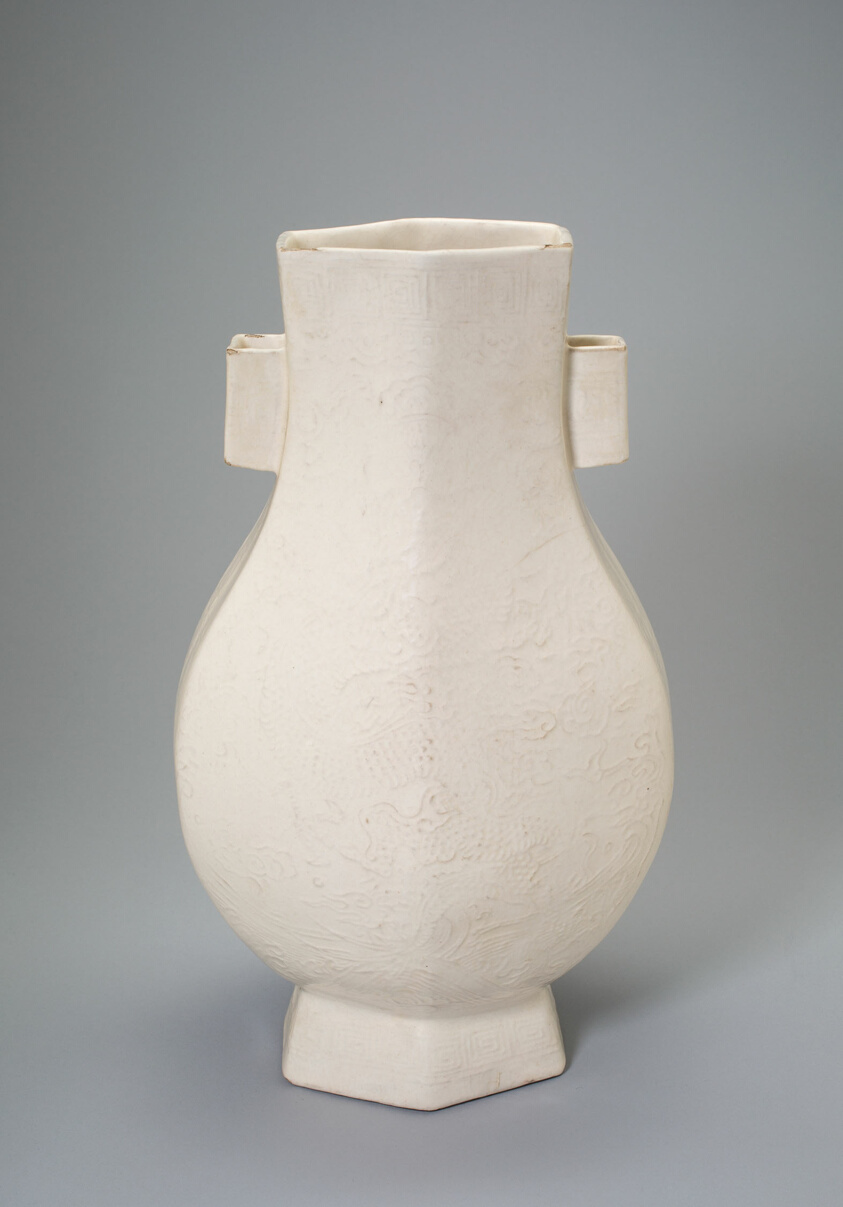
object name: Vessel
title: Vase in the Shape of an Archaic Bronze Vessel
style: ding, Chinese (culture or style), East Asian, asian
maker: China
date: Ming dynasty (1368–1644) or earlier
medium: Ding ware; stoneware with underglaze molded decoration and white glaze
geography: China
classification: stoneware; asian art; ceramics